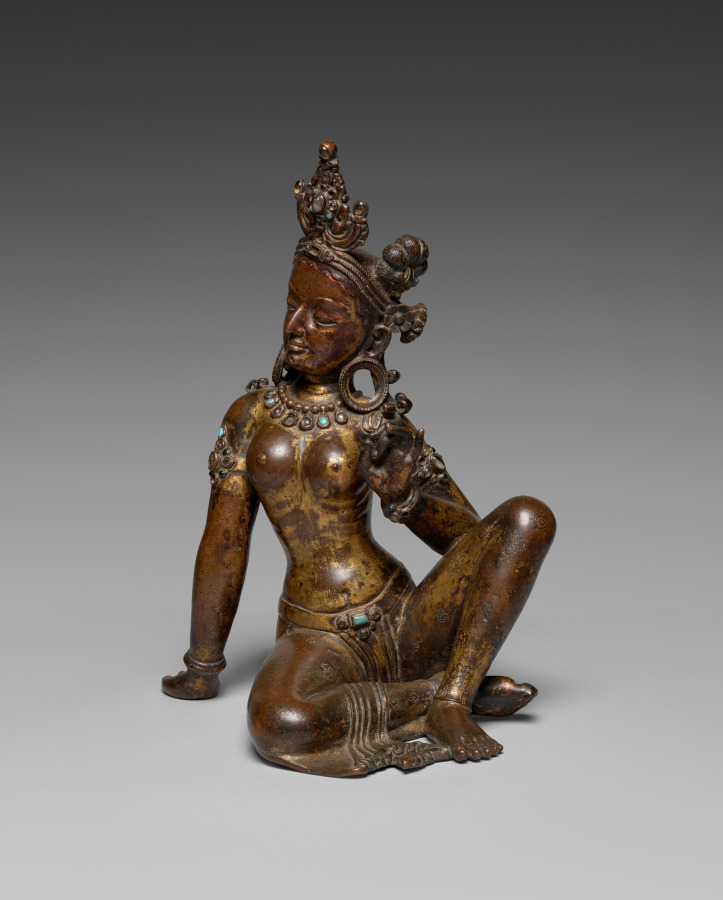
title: Goddess Uma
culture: Nepal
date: 1000s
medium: gilt bronze and semiprecious stones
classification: Sculpture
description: Uma is a mother goddess, and she is depicted here as turning toward her consort, the Hindu god Shiva, a companion sculpture from which this image of Uma has been separated. The grace and femininity of this solid-cast figure are balanced by her confident gesture and expression. She embodies the creative energy of god and the beauty of his creation. In Nepal, Hinduism and Buddhism have continued to flourish simultaneously, in contrast to Tibet, which is predominantly Buddhist, and India, where Buddhism was no longer practiced after the 14th century.